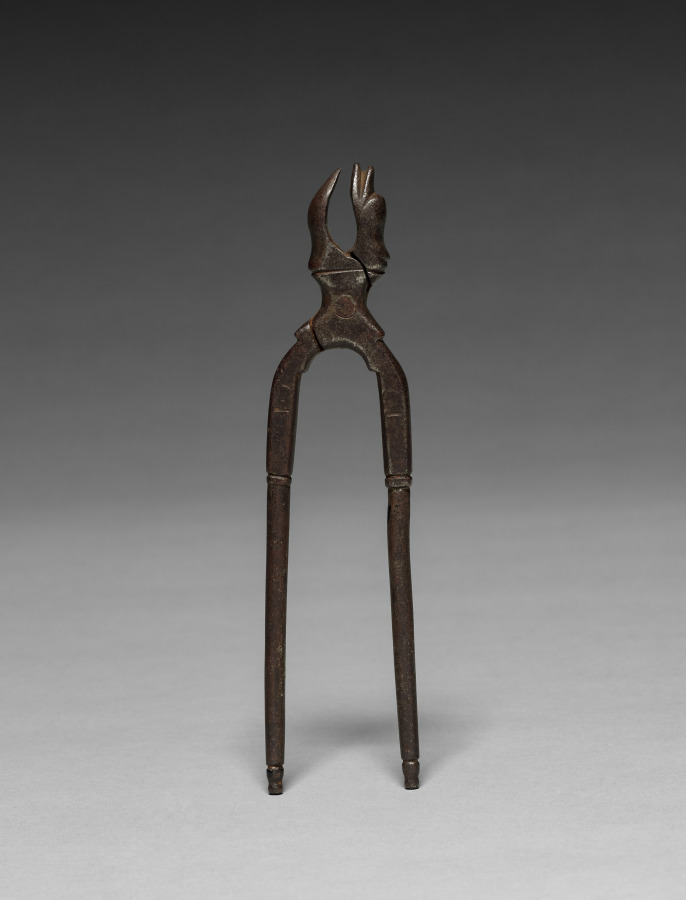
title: Pliers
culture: Europe, 16th-17th century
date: 1500s–1600s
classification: Tool